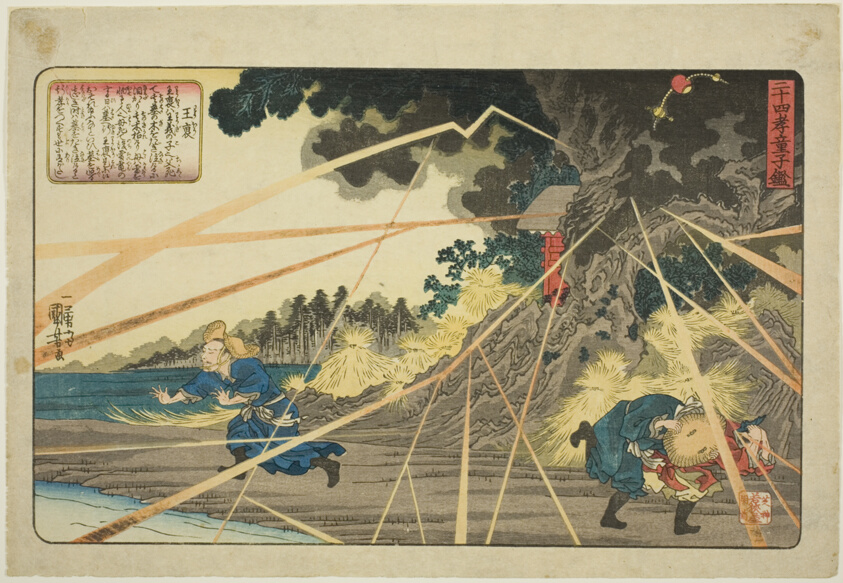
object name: Print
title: Wang Pu (Oho), from the series "Twenty-four Paragons of Filial Piety as a Mirror for Children (Nijushiko doji kagami)"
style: Japanese (culture or style)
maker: Utagawa Kuniyoshi (Japanese, 1797-1861)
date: c. 1843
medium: Color woodblock print; oban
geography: Japan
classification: woodblock print; print; asian art